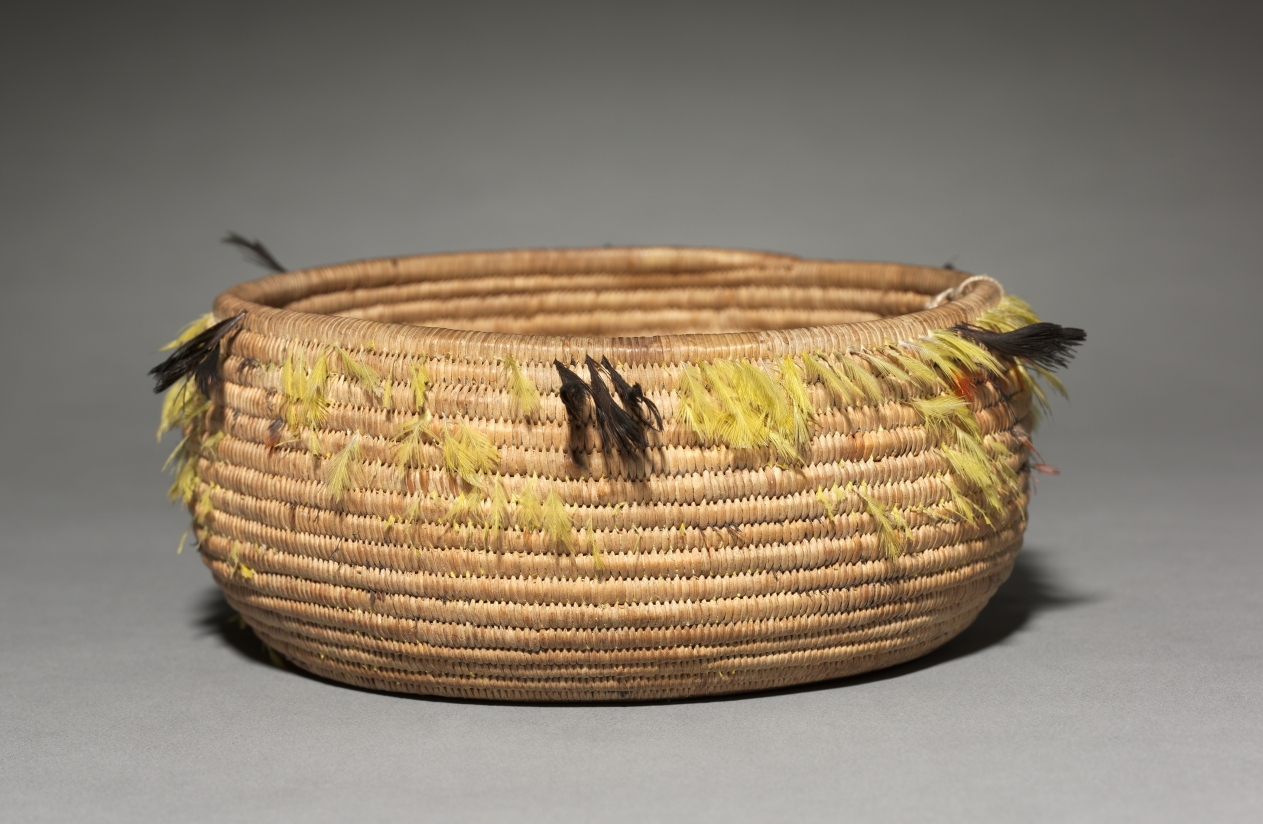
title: Gift Bowl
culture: California, Pomo, Eastern, early 20th century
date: c. 1900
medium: Sedge with Feathers; Coiled (3 rods)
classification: Basketry